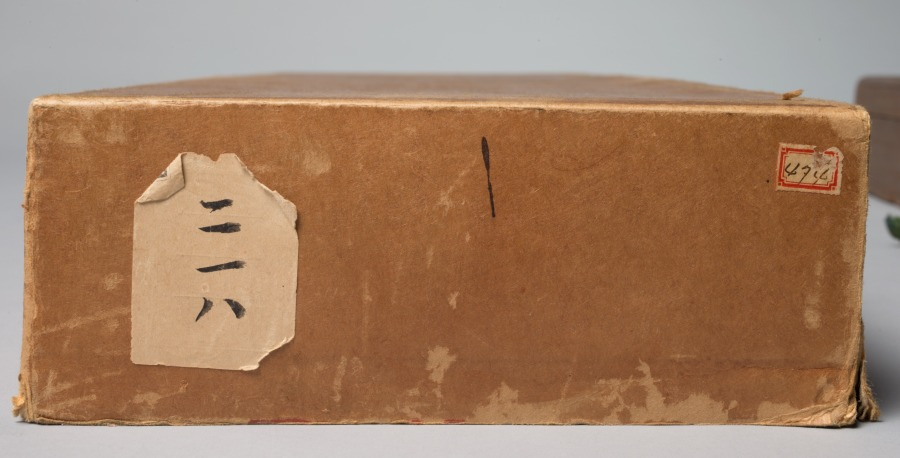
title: Sparrows on Blossoming Plum; A Sage with Tiger; Chinese Bird on Snow-Laden Branch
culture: Japan, Edo period (1615–1868)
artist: Kano Tan’yū (Japanese, 1602–1674)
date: 1661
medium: Triptych of hanging scrolls; ink and slight color on silk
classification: Painting